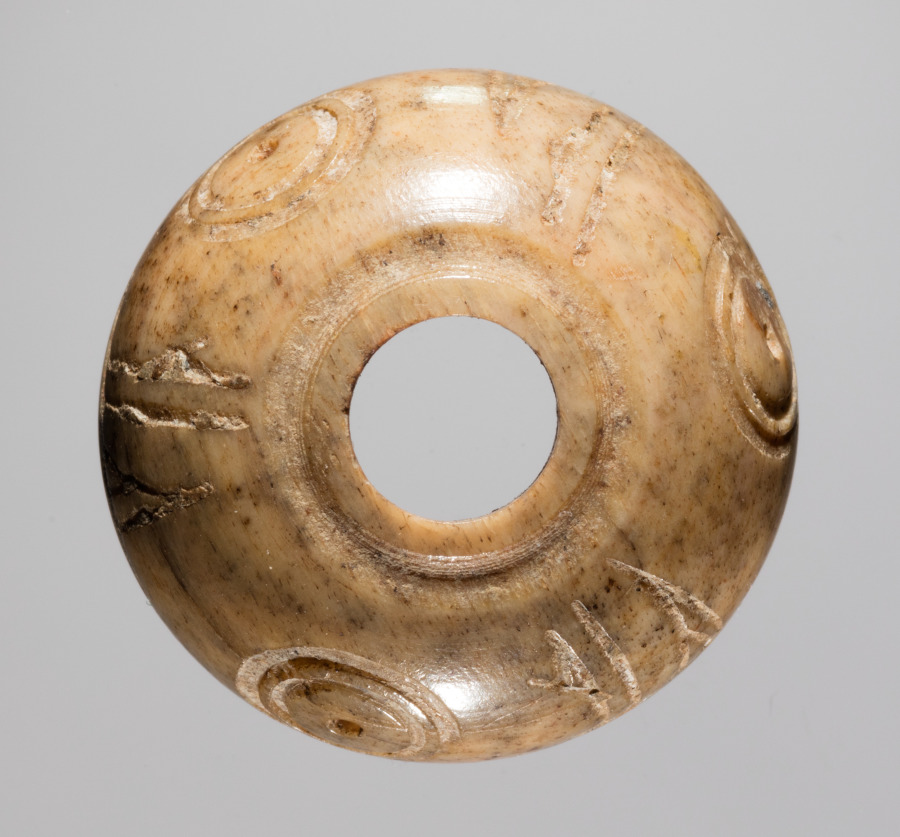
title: Spindle Whorl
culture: Iran, early Islamic period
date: 700s - 900s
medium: bone, incised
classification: Spindle Whorl